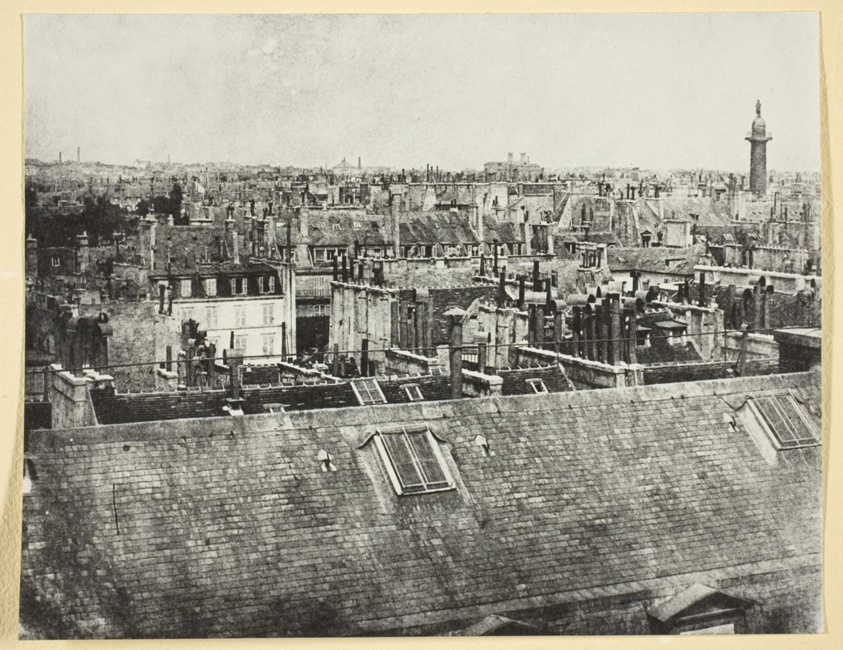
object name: Photograph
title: Les Toits de Paris (Vue de la rue Castiglione?)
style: 19th century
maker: Hippolyte Bayard (French, 1801–1887)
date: 1842/50, printed 1865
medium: Gelatin silver print, No. 15 from the portfolio "Bayard: XXV Calotypes, 1842-1850" (1965)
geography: France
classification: photographic process; photography; photograph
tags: Collected by Hugh Edwards, Paris